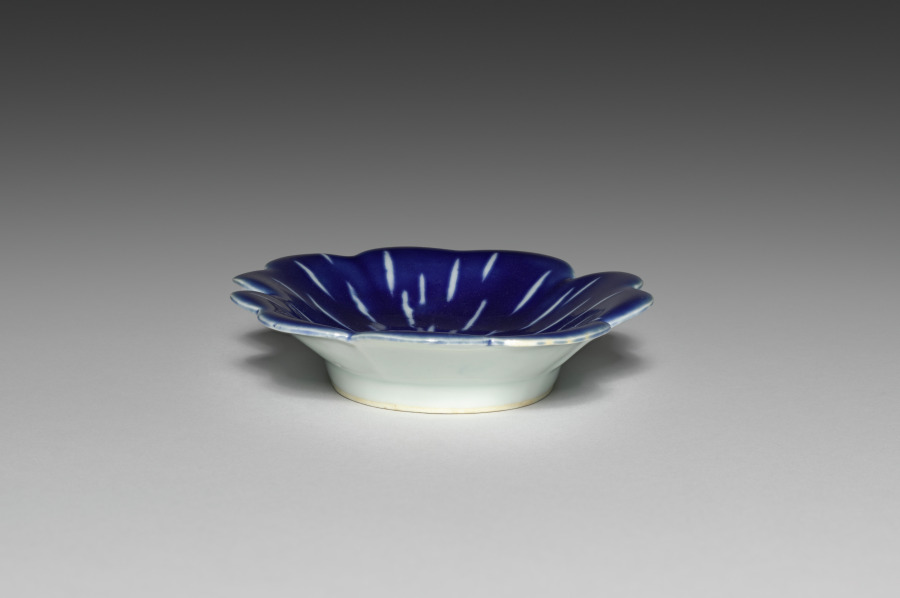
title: Small Dish (Kozara) with Fireworks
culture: Japan, Edo period (1615–1868)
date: mid-1600s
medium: Porcelain with molding and underglaze blue (Hizen ware, Nabeshima type)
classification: Ceramic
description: This dish evokes the popular summer pastime of fireworks displays.